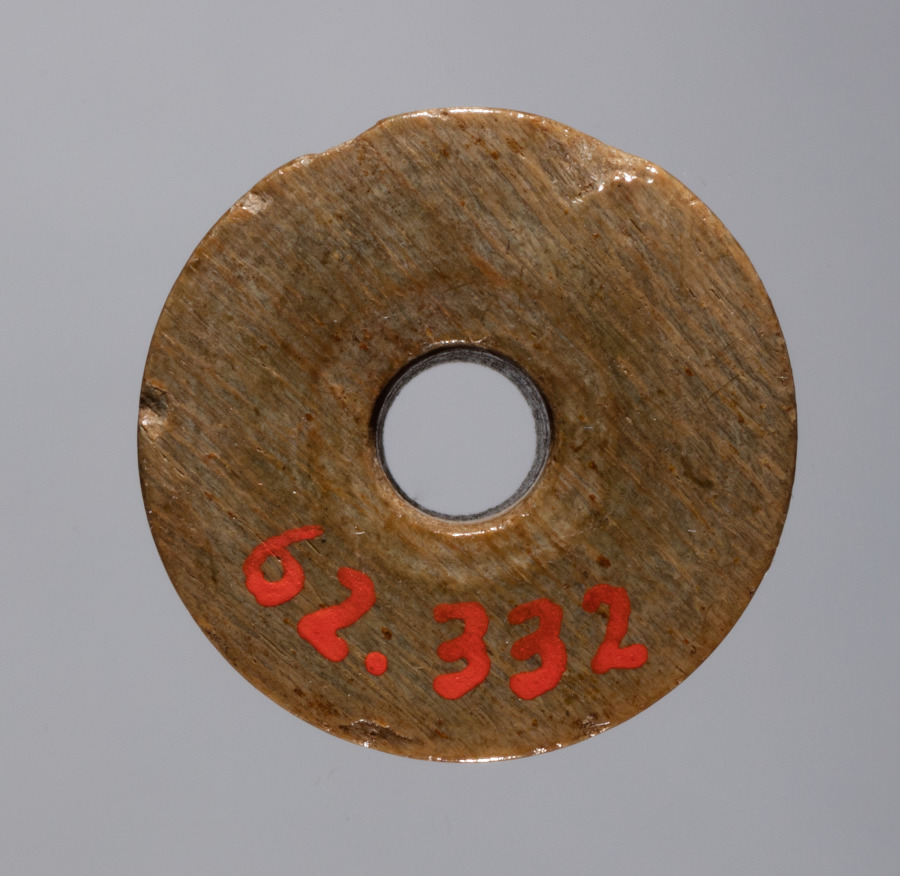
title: Spindle Whorl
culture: Iran, early Islamic period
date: 700s - 900s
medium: bone, incised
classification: Spindle Whorl